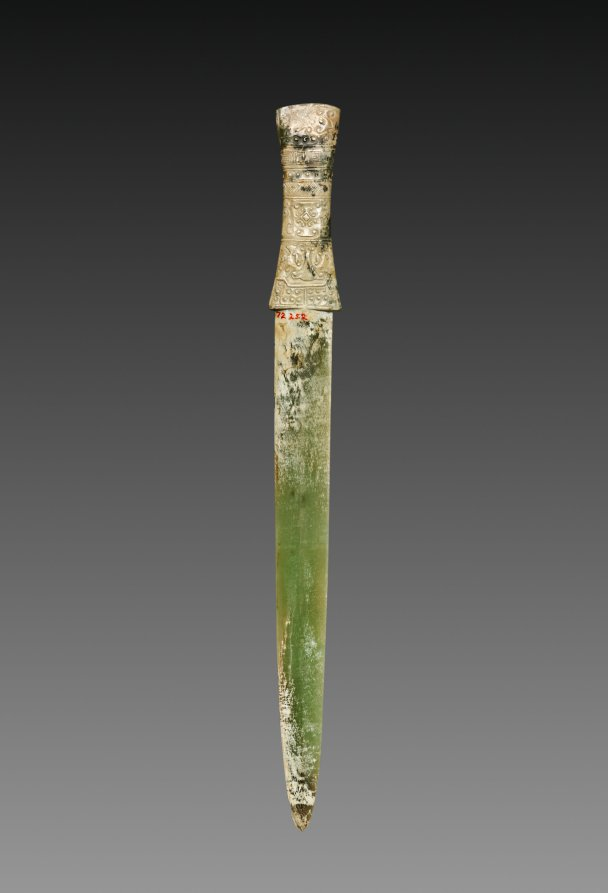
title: Ceremonial Knife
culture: China, Qing dynasty (1644–1911)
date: 1700s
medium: green jade, partly clarified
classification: Jade